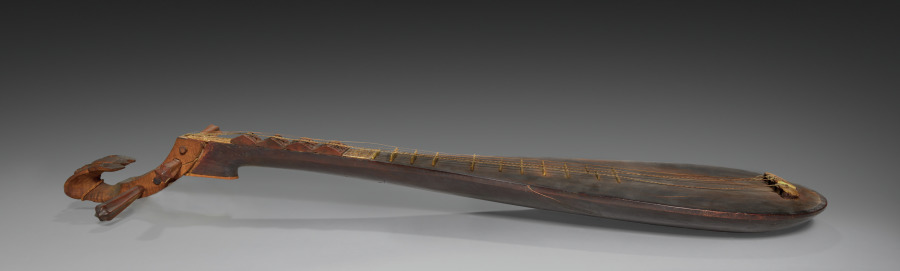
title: Pipa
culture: China, Qing dynasty (1644-1911)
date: 1800s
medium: Wood, ivory, bone, gut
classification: Musical Instrument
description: The term pipa, known since the 3rd century BC, describes the playing motion of the right hand: pi, “to play forward” (left), and pa, “to play backward” (right). A type of lute played with the fingers, it is used in opera and storytelling ensembles and has an impressive, virtuosic solo repertoire. Historic imagery, such as wall paintings, documents the spread of the pipa, along the Silk Road from western and central Asia to China. The bat finial here is a commonly used device on 19th-century Chinese lutes symbolizing good luck.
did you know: The string holder is made of bone.